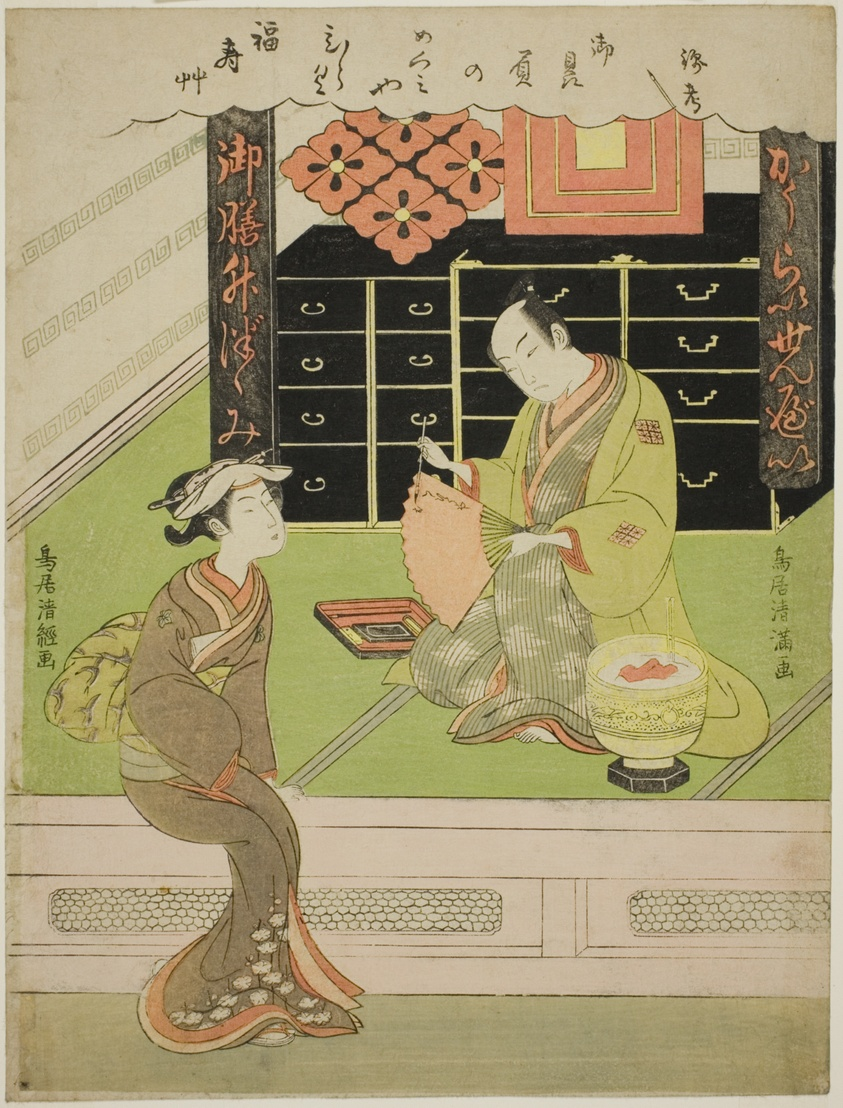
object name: Print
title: The Actor Ichikawa Komazo I in his rice cracker shop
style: Japanese (culture or style)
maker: Torii Kiyomitsu I; Japanese, 1735–1785; and; Torii Kiyotsune; Japanese, active c. 1757-79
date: c. 1771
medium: Color woodblock print; chuban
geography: Japan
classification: woodblock print; print; asian art